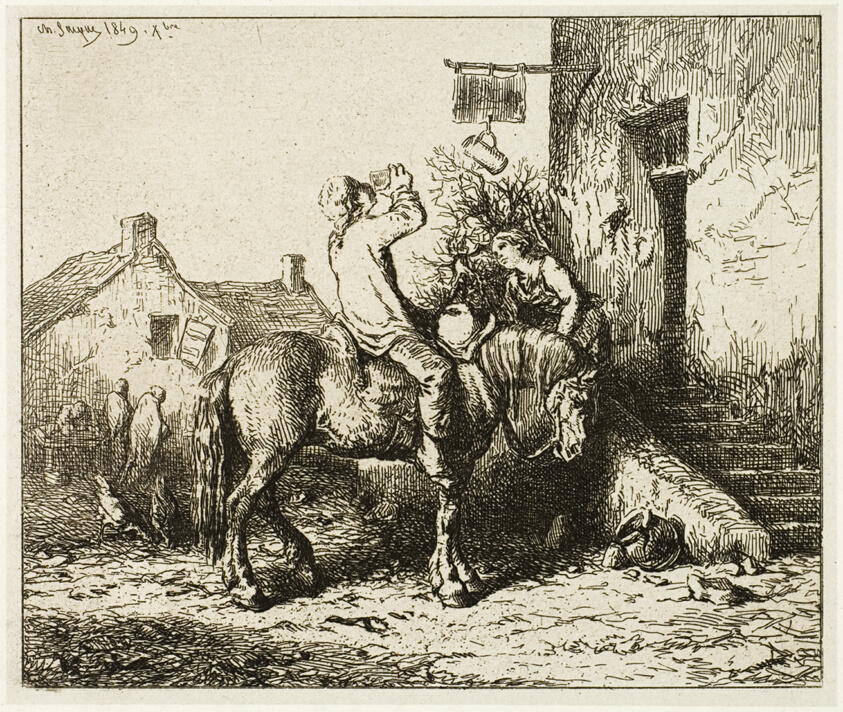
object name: Print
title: Entrance to an Inn, with Peasant Drinking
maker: Charles Émile Jacque (French, 1813-1894)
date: 1849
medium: Etching on light gray China paper laid down on ivory wove paper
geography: France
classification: etching; print; prints and drawing